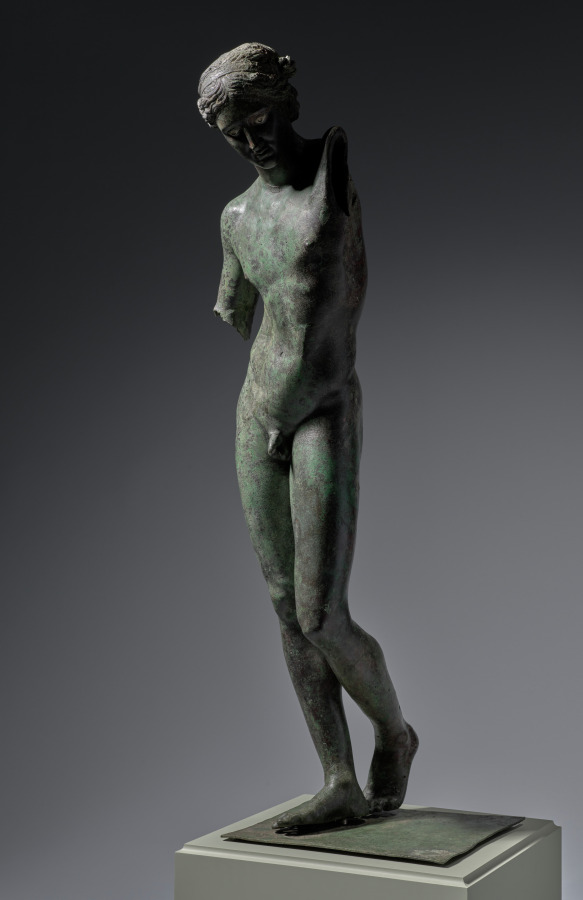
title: The Cleveland Apollo: Apollo Sauroktonos (Lizard-Slayer) or Apollo the Python-Slayer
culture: Greece, Athens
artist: attributed to Praxiteles (Greek, Athenian, c. 400–330 BCE)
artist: or Follower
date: c. 350–200 BCE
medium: bronze, copper, and stone inlay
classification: Sculpture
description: The Cleveland Apollo has been called both Lizard-Slayer (Sauroktonos) and Python-Slayer. The first name comes from the Roman author Pliny the Elder (23–79 CE), who noted in describing bronze works made by the Athenian sculptor Praxiteles (active around 370–330 BCE), “the youthful Apollo [is] known as the Sauroktonos because he is aiming an arrow at a lizard [Greek sauros] which is stealing toward him.” Scholars have long connected this description with artworks showing the young Greek god Apollo in a distinctive pose and hairstyle, standing on his right leg and leaning to his left. In more completely preserved versions, Apollo reaches toward a tree with his left arm and seems to take aim at a lizard. The Cleveland Apollo shows the adolescent god similarly posed and coiffed, making it an important addition to the Apollo Sauroktonos group—the only surviving large-scale bronze sculpture of the type. The young Greek god Apollo, identifiable by his distinctive hairstyle and pose, stands on his right leg and leans to his left, probably toward a now-lost tree. Although now separated, the left forearm and hand survive, together with an unusual lizard-like creature, perhaps drawn from the world of myth. A flat bronze base also remains, though it may be a later adaptation. A tree or other support has been lost, probably smaller than in the marble versions. Given its material and very high artistic quality—note the lifelike hair, fingernails, and inlaid copper lips and nipples—more than one scholar has suggested that the Cleveland Apollo could be the very sculpture seen by Pliny. Some have called the sculpture “Python-Slayer,” seeing the oddly shaped serpentine creature with asymmetrical legs as the mythical Python killed by Apollo in establishing his sanctuary at Delphi. But technical details may explain some of the asymmetry, and no other specific evidence connects it to Delphi. Most scholars would retain the name Sauroktonos (Lizard-Slayer) for the Cleveland Apollo, even as some debate whether it was made by Praxiteles himself or a later follower.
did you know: The Cleveland Apollo is the only surviving large-scale bronze sculpture of its type, Apollo Sauroktonos (the Lizard-Slayer).